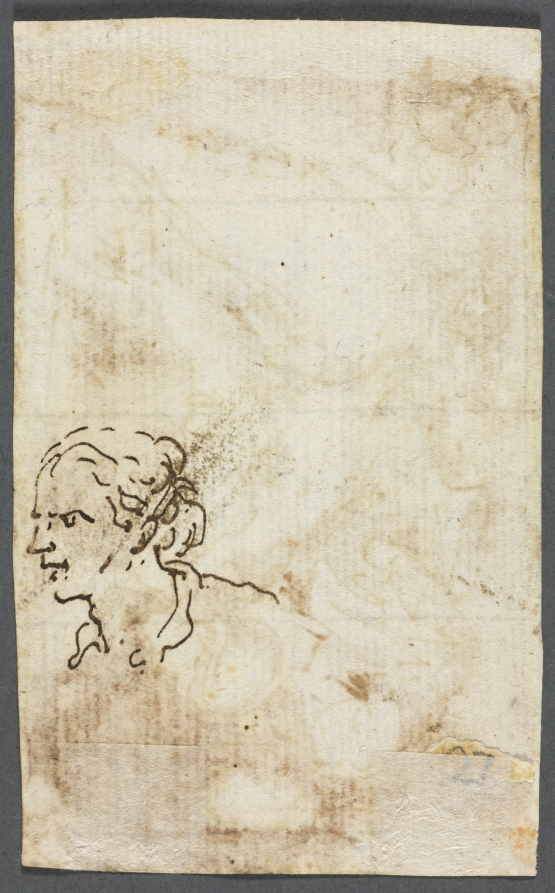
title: Figure Studies (verso)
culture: Italy, 17th century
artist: Salvator Rosa (Italian, 1615–1673)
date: c. 1640–1649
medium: pen and brown ink and wash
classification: Drawing